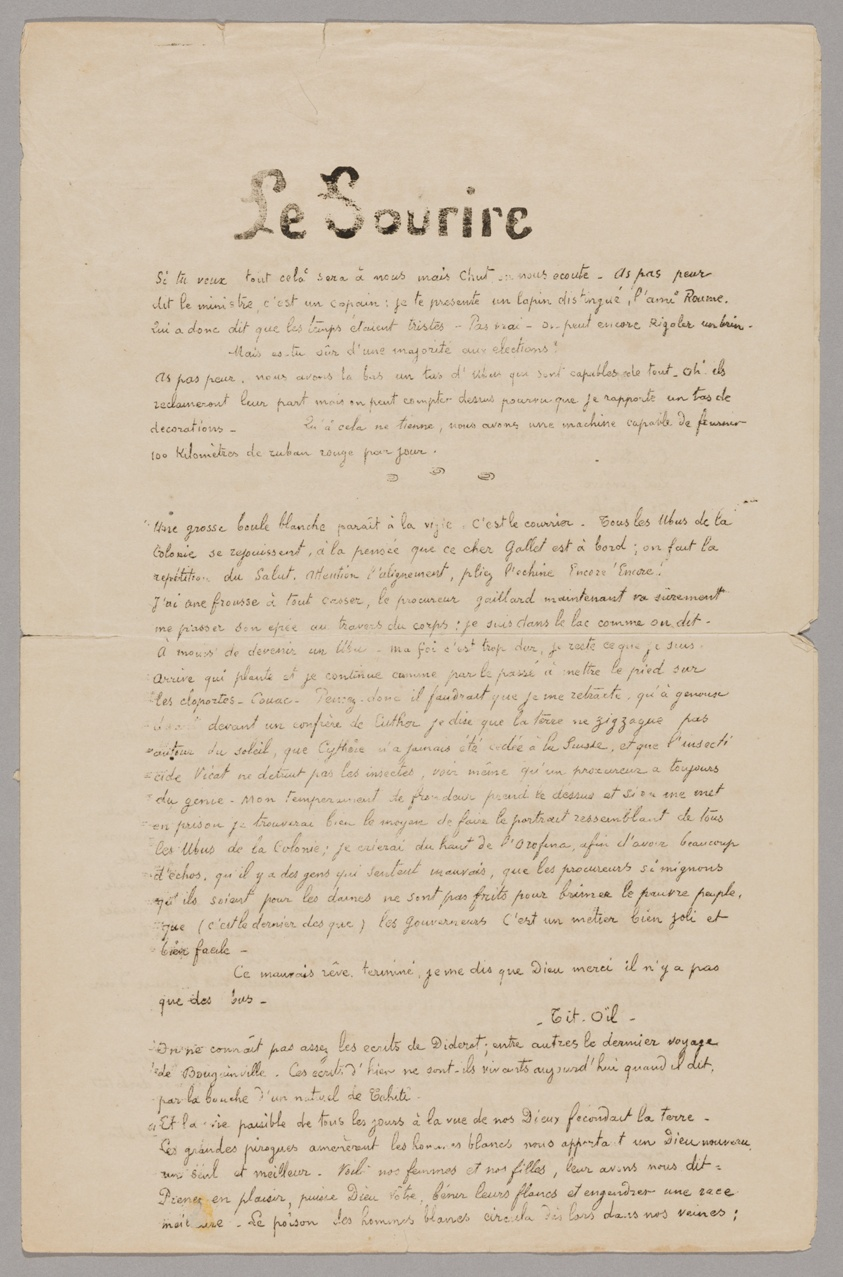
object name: Print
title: Le sourire: Journal sérieux, Nov. 1899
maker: Paul Gauguin (French, 1848-1903)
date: 1899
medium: Mimeograph in brownish-black ink, with wood-block prints in black ink on cream wove paper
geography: France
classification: woodcut; print; prints and drawing